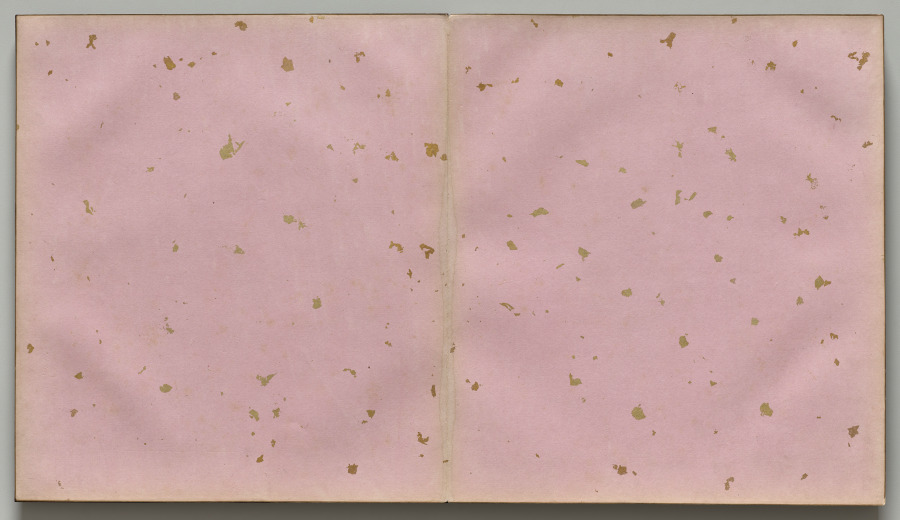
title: Absorb the Past; Abandon the Present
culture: China, Qing dynasty (1644–1911)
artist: style of Qian Hui'an (Chinese, 1833–1911)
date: 1800s–1900s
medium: Accordion-style album of 10 painted leaves; ink and color on silk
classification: Painting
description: Qian Huian, active in Shanghai, was best known for his paintings of beautiful women, and historic and mythological figures, rendered in a distinct style. His figures appear eccentric and the color palette pale to pink. The album’s title, Absorb the Past, Abandon the Present, reflect the desire to find refuge in China’s Past, as the country was going through the devastating Taiping rebellion at the time the paintings were created.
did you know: Leaf four depicts Tao Yuanming, carried by servants in a basket as he had an ailing foot. Tao wrote the Peach Blossom Spring tale, in which a fisherman loses his way and ends up in a utopia.